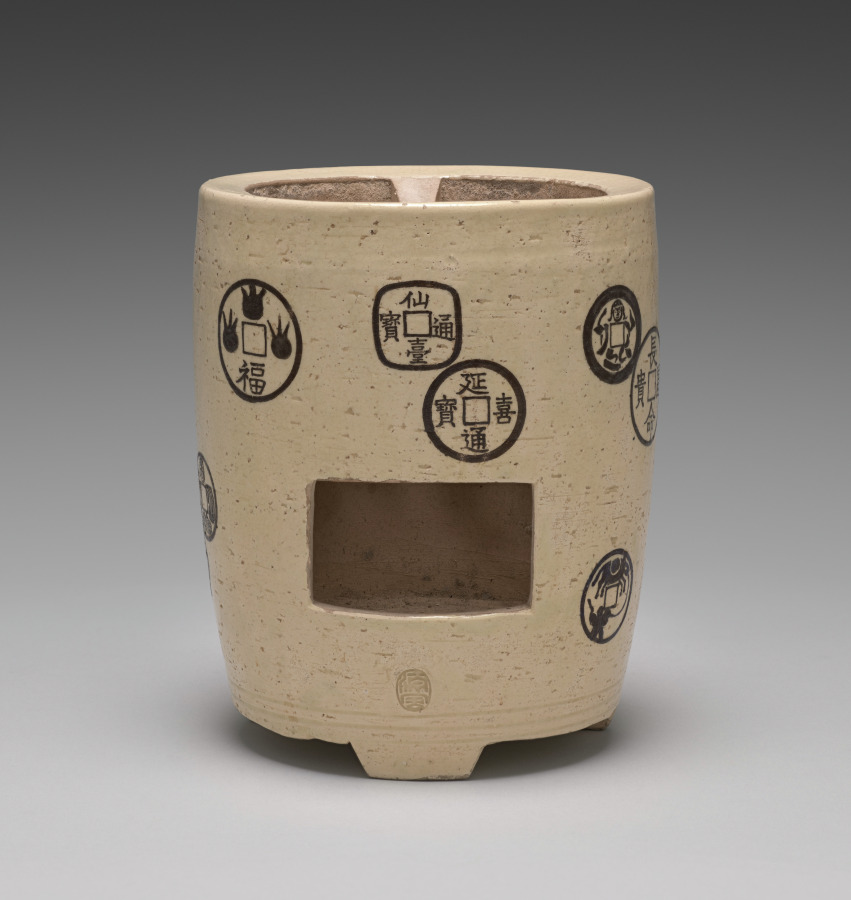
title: Brazier with Coins Motif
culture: Japan, Meiji period (1868–1912)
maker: Seifū Yohei III (Japanese, 1851–1914)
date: 1893–1914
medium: Stoneware with underglaze iron oxide designs and crackling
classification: Ceramic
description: Tall pottery braziers called ryōro are often used to heat the water for the tea served at sencha gatherings. This one sits on three sturdy legs, one of which bears the artist’s seal on its face. A horizontal rectilinear opening above this leg allows air to circulate into the lower part of the brazier. The top part is outfitted with three prongs onto which the kettle can be lowered; below them is a basin, perforated with circular holes, that holds the charcoal fuel. The brazier is decorated under the crackled transparent glaze with a design of old coins in iron oxide. The motif is cleverly chosen, for most older coins are round with a central hole, often square, which echoes the cylindrical form of the brazier with its rectilinear “wind gate,” or fūmon.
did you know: One coin is painted with the Japanese god of wealth, Daikokuten, standing upon two bales of rice.